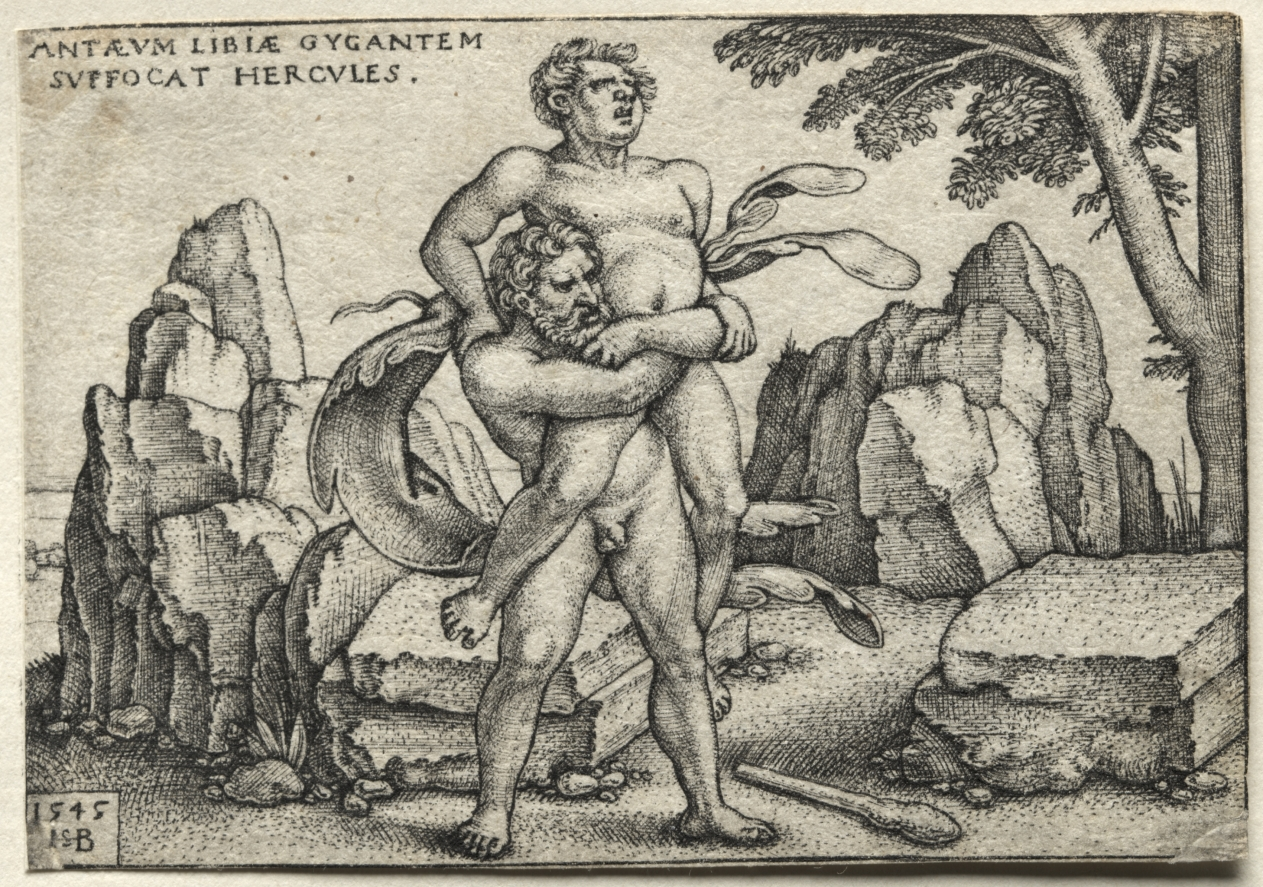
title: The Labors of Hercules: Hercules Crushing Antaeus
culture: Germany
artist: Hans Sebald Beham (German, 1500–1550)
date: 1545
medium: engraving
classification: Print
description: The giant Antaeus was invincible as long as he touched the earth, which gave him his overwhelming strength. In this scene, Hercules cleverly heaves Antaeus off the ground to weaken and crush him. This tale was especially popular during the Renaissance, when it was perceived as an allegory of moral strength triumphiant over earthly desires. Beham was one of several German printmakers referred to today as the “Little Masters.” They established their artistic prowess by engraving remarkably small prints, appealing to collectors fascinated with miniature objects and curiosities.